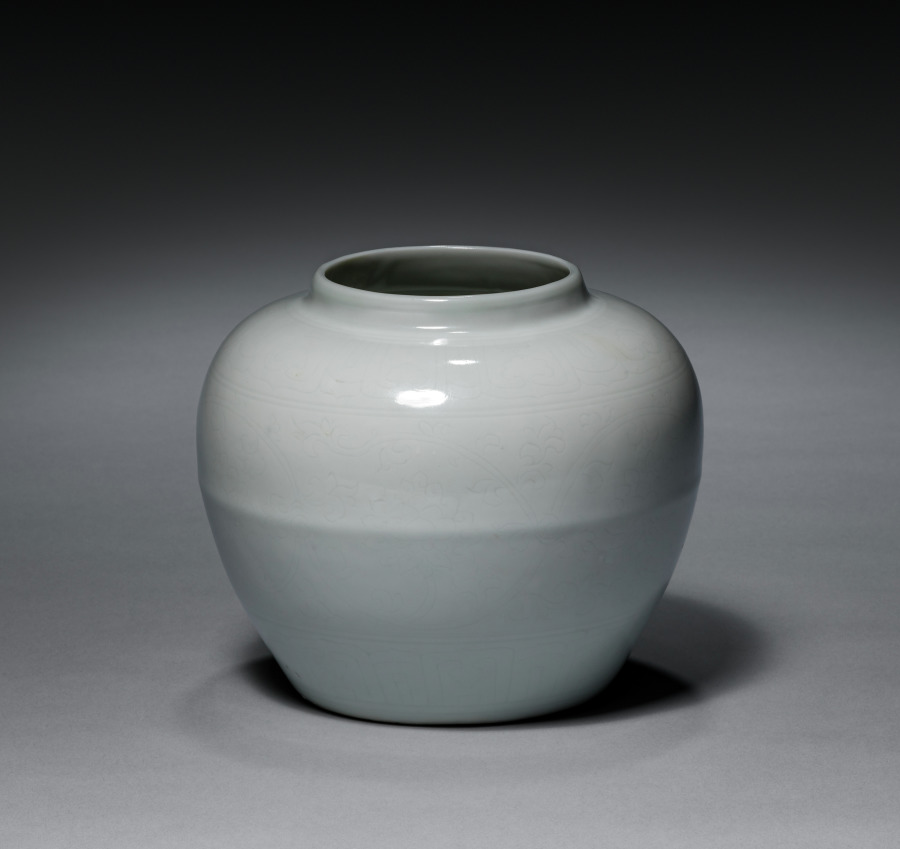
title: White-Glazed Jar with Hidden Design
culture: China, Jiangxi province, Jingdezhen kilns, Ming dynasty (1368-1644)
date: 1500s–1600s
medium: Porcelain with sweet-white (tianbai; 甜白) glaze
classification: Ceramic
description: White was a ritual color used in Buddhist ceremonies, as well as the color of mourning. This jar is made of two molded halves that were joined where the vessel’s middle section shows a raised line. It is covered by a silky white glaze called “sweet-white” (tianbai; 甜白). A “hidden design” (anhua; 暗花) of floral scrolls on the shoulder and stylized petals around the base shine through the glaze. The jar may have been used as a planter, a vase for flowers, or it may have held incense sticks on a home altar.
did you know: Tianbai, or sweet-white glaze, was developed to accommodate the Yongle emperor’s (reigned 1403–24) preference for white ceramics.